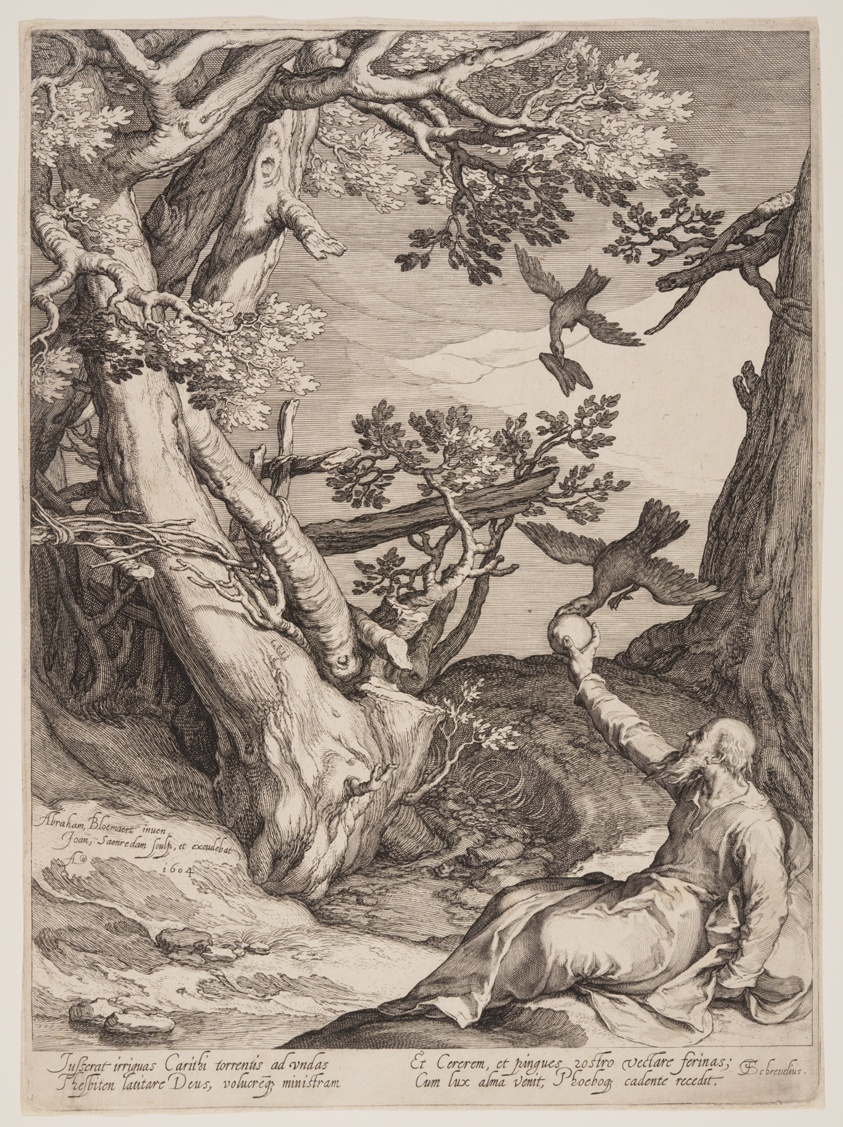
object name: Print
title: Elijah in the Wilderness Fed by Ravens, from Four Scenes from the Life of the Prophets, Isaiah, Ahajah and Elisha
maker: Jan Saenredam (Dutch, 1565–1607); after Abraham Bloemaert (Dutch, 1566–1651)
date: 1604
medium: Engraving on ivory laid paper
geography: Netherlands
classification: print; paper; prints and drawing; engraving